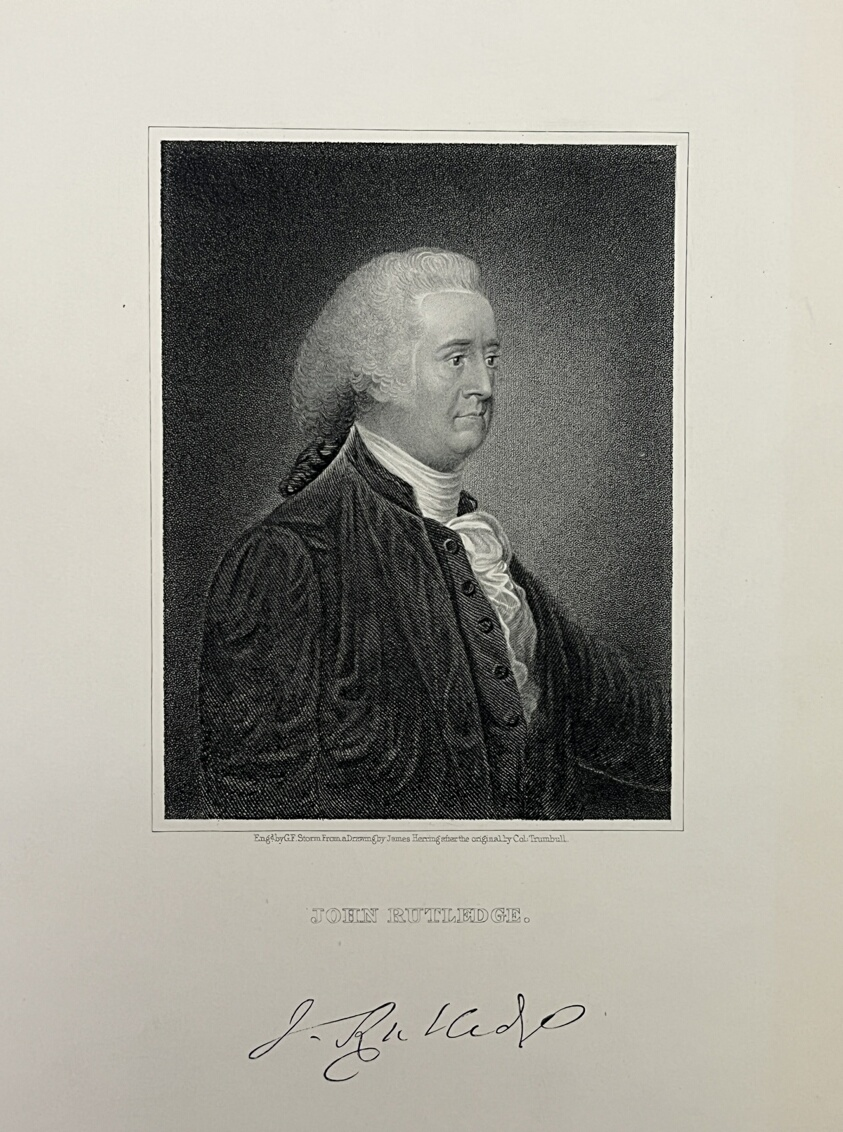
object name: Print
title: John Rutledge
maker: G.F. Storm (English, active in America, mid 19th century); after James Herring (American, 1794-1867); after John Trumbull (1756-1843)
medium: Lithograph on paper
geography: England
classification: reproduction; print; prints and drawing